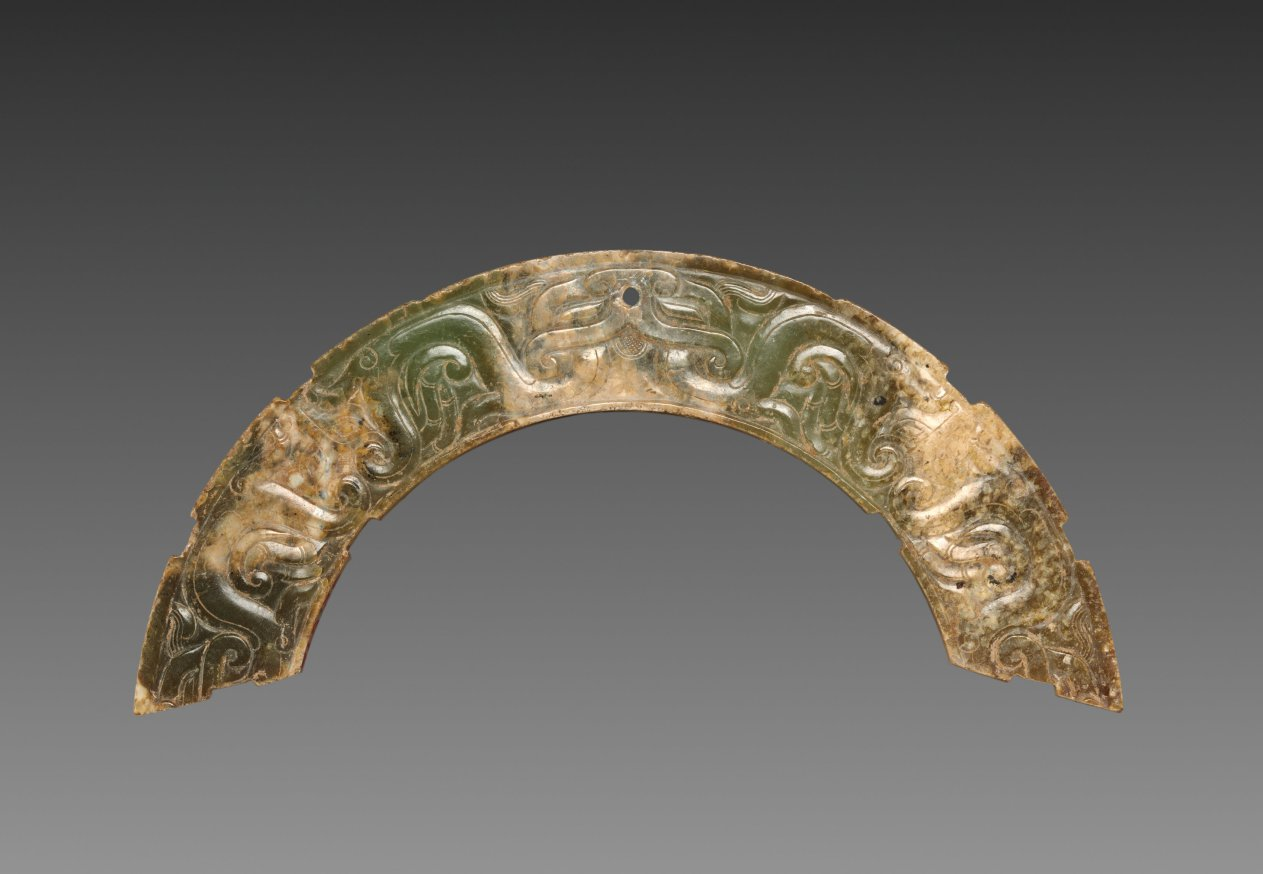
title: Arc-shaped Pendant with Animal Mask and Interlaced Animal Bands (Huang)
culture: China, Warring States period (475–221 BCE) to Western Han dynasty (206 BCE–8 CE)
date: 300–100 BCE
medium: nephrite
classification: Jade